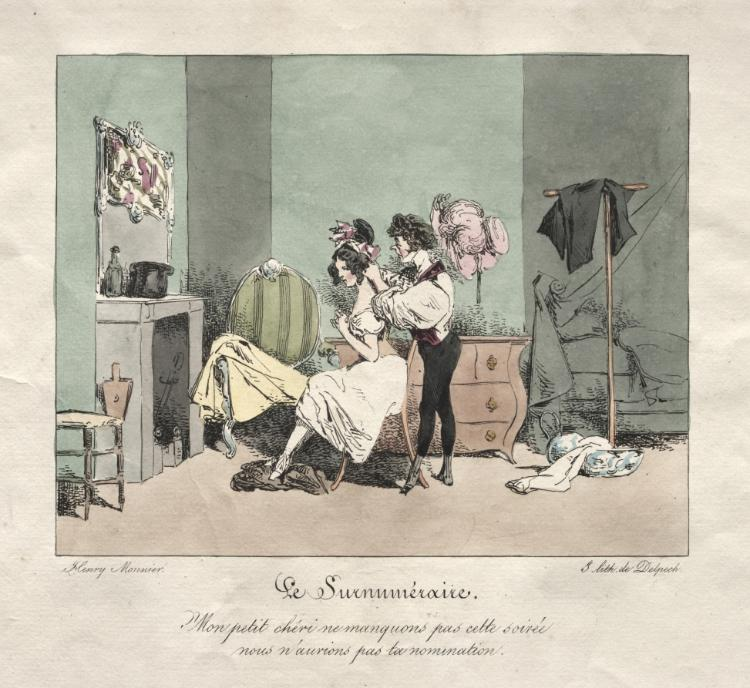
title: Administrative Customs: Supernumerary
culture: France, 19th century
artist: Henry Bonaventure Monnier (French, 1805–1877)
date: mid-1800s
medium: color lithograph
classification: Print